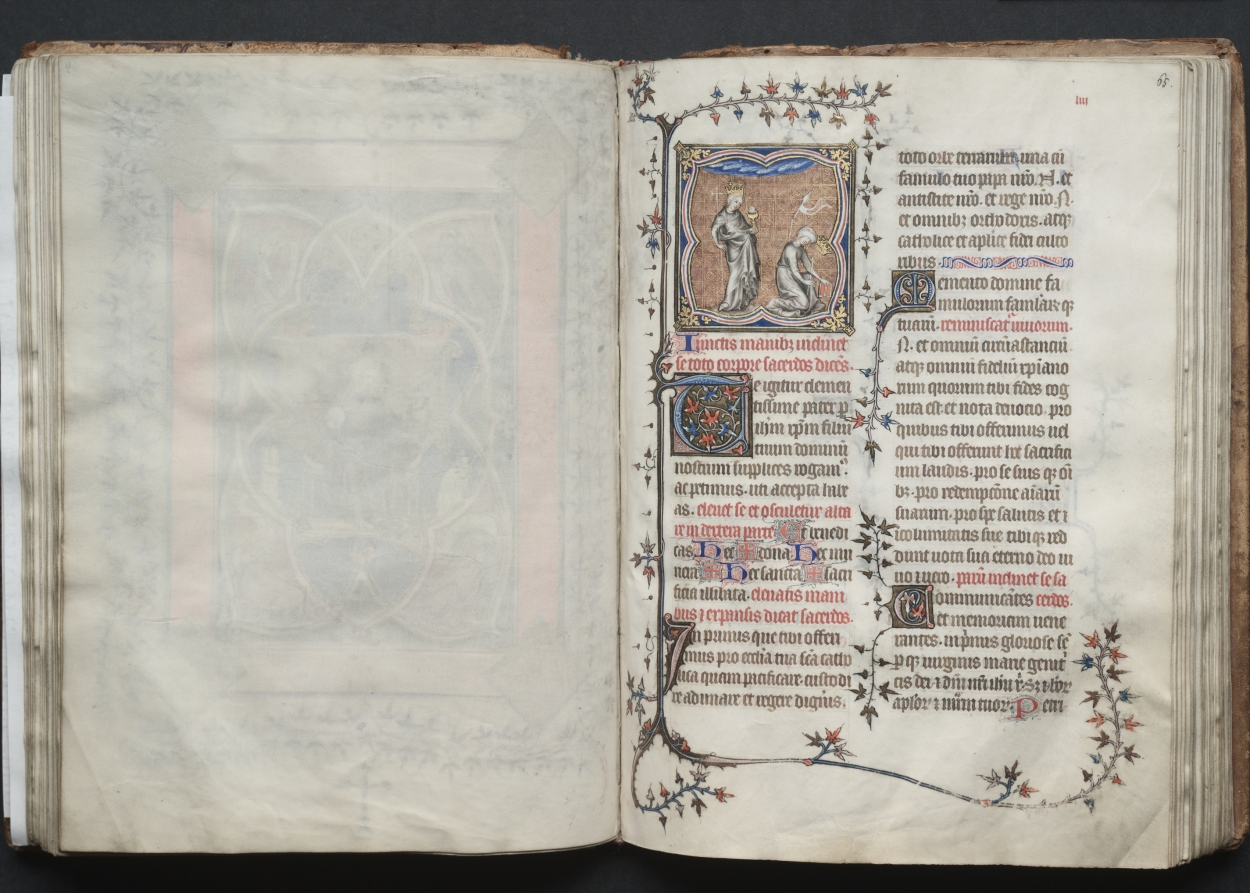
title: The Gotha Missal: Fol. 65r, The Church and the Synagogue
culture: France, Paris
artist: Master of the Boqueteaux (French)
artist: and Workshop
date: c. 1375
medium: ink, tempera, and gold on vellum; blind-tooled leather binding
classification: Bound Volume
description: The style and quality of this manuscript's decoration is typical of deluxe Parisian books made for aristocratic or royal patrons. Most of the book's decoration appears to be the work of the Master of the Boqueteaux, an artist active at the court of King Charles V (died 1380). His style was apparently shared by a number of book illuminators working in and around Paris. It is very possible that the Gotha Missal belonged to Charles V, but is not provable because the manuscript has no royal portraits and lacks a colophon. Given the book's magnificent decoration, however, it would seem that it was produced for a Valois prince, if not for the king himself. The manuscript receives its name from the German dukes of Gotha, its later owners.